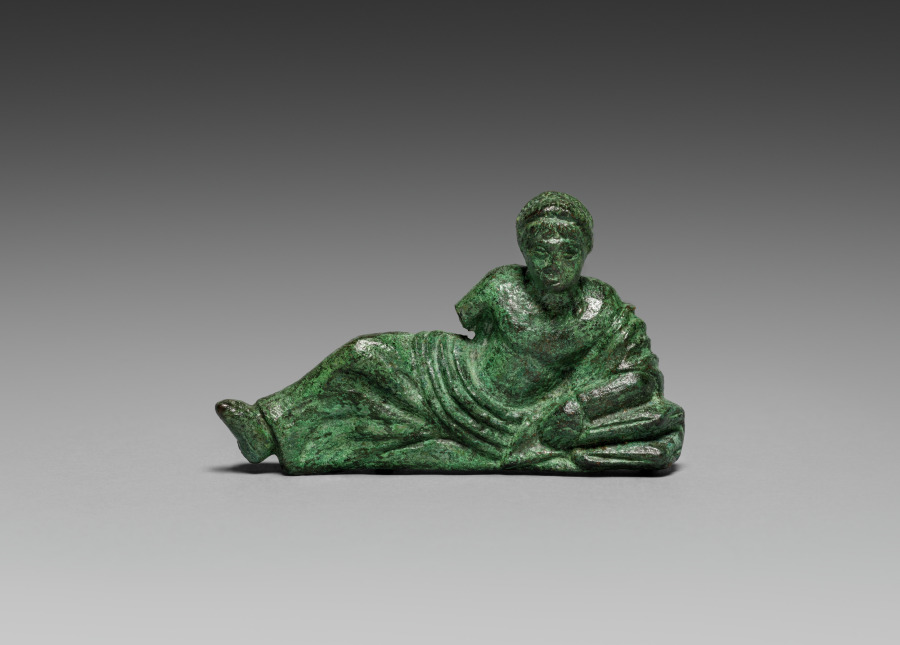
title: Vessel Ornament of Banqueter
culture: Etruscan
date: c. 400–375 BCE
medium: bronze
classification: Sculpture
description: This bronze banqueter figurine was one of six once adorning the rim of a large basin, now lost. Cast in molds with individualized details, most have grooves on their underside to attach to the basin. Minute traces of gilding remain on areas of clothing and skin (mostly visible only under magnification), suggesting that they may have been completely gilded. Two handles in the form of hippocampi, horses with serpentine tails, also belonged to the basin and are now displayed at the Michael C. Carlos Museum at Emory University. The basin may have been used to hold liquid for a banquet, or was perhaps funerary. This bronze figurine lies on his side in the posture of an ancient banqueter. His right arm is broken off but may once have rested on his hip. The figurine wears a garland on his head and a himation draped loosely around his left shoulder, revealing a muscular chest. One leg is raised over the other and a foot is exposed. Specks of gilding remain on the chest and head, but is different in color than that on the other five figurines. Also unlike the others, this one bears a visible seam across its entire length and has no groove underneath.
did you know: This reclining male banqueter demonstrates the posture of symposium guests.